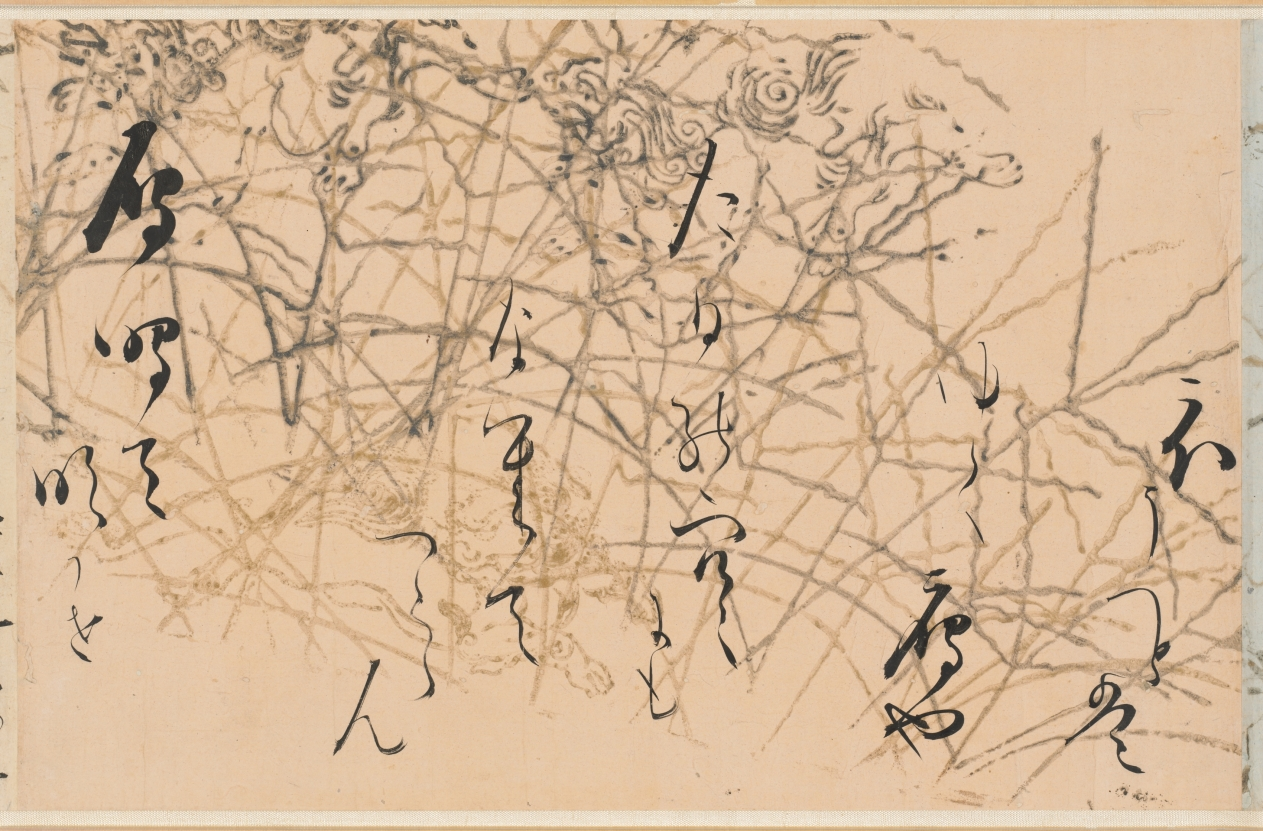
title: Selections from the New Collection of Japanese Poems from Ancient and Modern Times (Shinkokin wakashū) with Printed Designs of Chinese Lions and Crab Finger Grass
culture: Japan, Edo period (1615–1868)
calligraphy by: Hon'ami Kōetsu (Japanese, 1558–1637)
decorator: Tawaraya Sōtatsu (Japanese, c. 1570–c. 1640)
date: early 1600s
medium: handscroll; ink, gold, and silver on paper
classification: Calligraphy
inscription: Seal: 光悦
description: Hon’ami Kōetsu was a calligrapher and craftsman who frequently collaborated with the painter Tawaraya Sōtatsu, considered the first master of the Rinpa school. Kōetsu brushed seven poems from the autumn section of a poetry anthology onto dyed paper with motifs designed and printed in gold and silver by Sōtatsu.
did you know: Before becoming a master painter of screens, Tawaraya Sōtatsu painted fans.